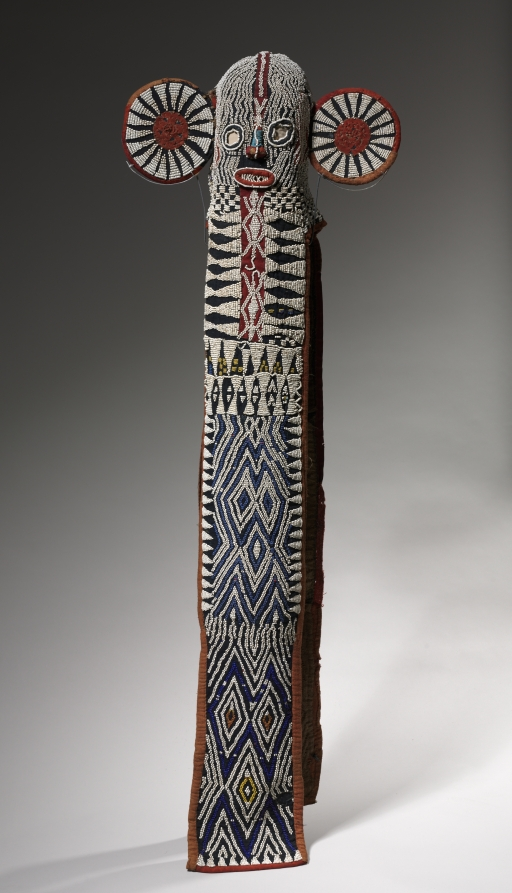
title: Mask (mbap mteng): Elephant (aka)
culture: Africa, Central Africa, Cameroon, Grassfields region, Bamileke-style maker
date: early 1900s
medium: Cotton, burlap, glass beads, twine, leather, and wood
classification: Mask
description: The name given to masks like this, mbap mteng, means "animal with huge ears." In the Cameroon Grassfields kingdoms, the elephant signifies power, authority, prestige, and leadership. The colorful glass beads that decorate the mask’s surface were imported from Venice and Bohemia (in Europe) and signal wealth and prosperity. Its geometric patterns include triangles that evoke the leopard, another animal linked with royal power. Members of Kuosi, an elite male society, wore such elephant masks for ritual dances and funerary ceremonies. This mask would have been worn with a costume that included a feather headdress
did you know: Performers wore elephant masks with indigo-dyed robes, red feather headdresses, and leopard pelts. Leopards and elephants symbolized royal power.